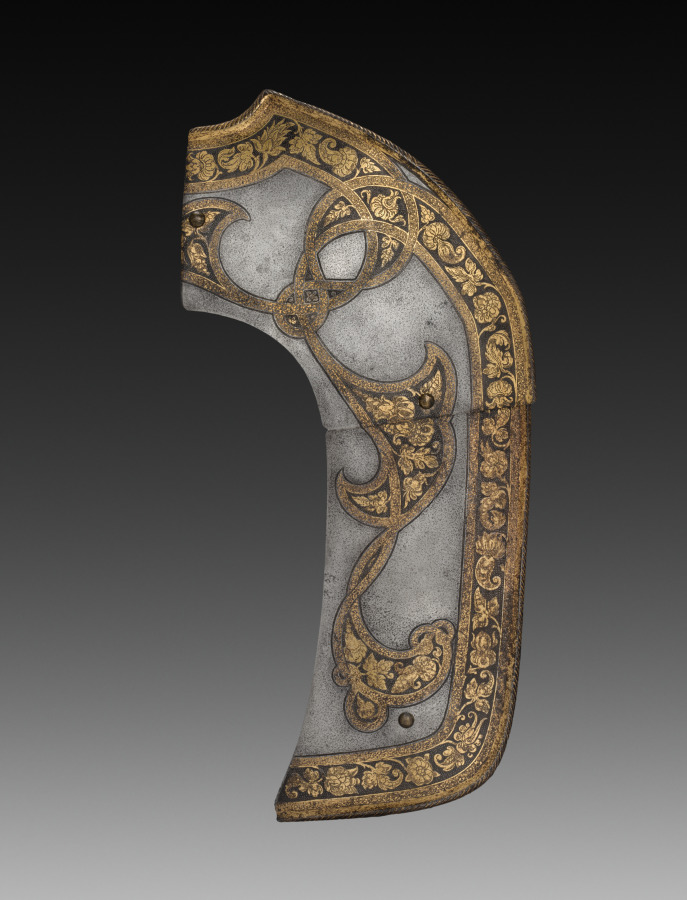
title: Pommel Plates from the Garniture of Rudolf II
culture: Germany, Augsburg, 16th century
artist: Anton Peffenhauser (German, 1525–1603)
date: c. 1571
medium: blued, etched, and gilded steel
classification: Arms and Armor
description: These plates, once part of a saddle, are from a tournament armor for man and horse made for the sons of Emperor Maximilian II, archdukes Rudolf and Ernst. Most of the remaining elements of this armor are still in the collections of the Imperial Armouries in Vienna. The decorative pattern (in the imperial colors of black and gold) forms elegant knots, with distinctive foliage and hop sprigs filling the loops.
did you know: Once part of a saddle, these plates protected the rider's thighs.